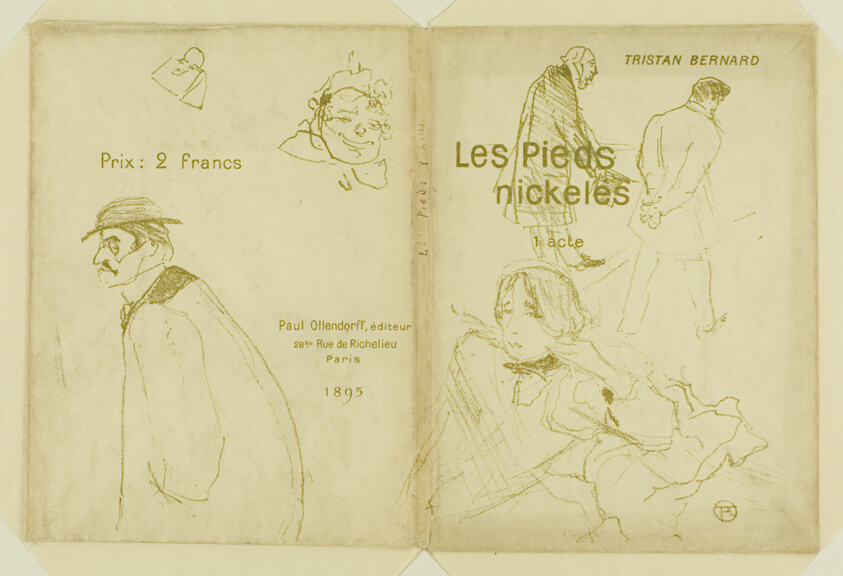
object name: Print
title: Les Pieds nickelés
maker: Henri de Toulouse-Lautrec (French, 1864-1901)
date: 1895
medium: Color lithograph on cream wove paper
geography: France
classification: lithograph; print; prints and drawing